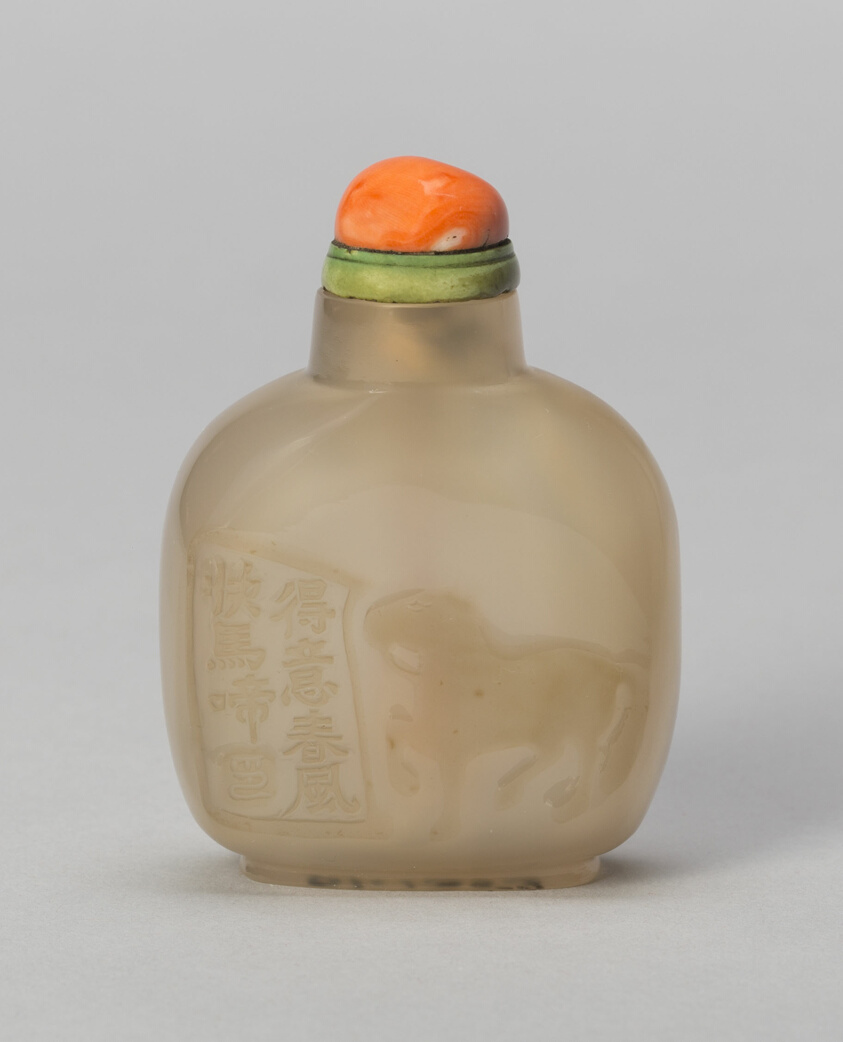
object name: Vessel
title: Snuff Bottle with a Horse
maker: China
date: Qing dynasty (1644–1911), 1800–1850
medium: Shadow agate with carved decoration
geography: China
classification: snuff bottle; asian art; vessel